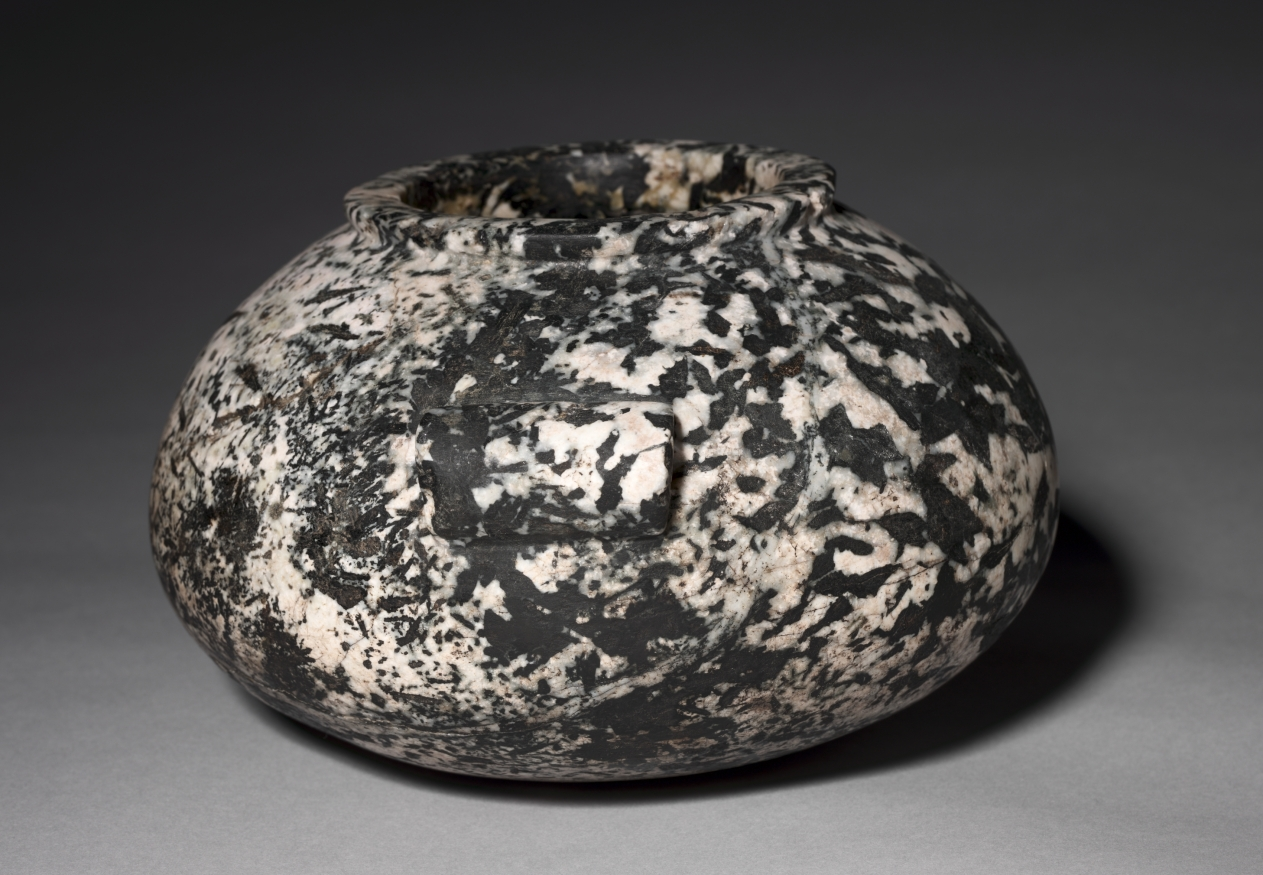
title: Squat Jar with Lug Handles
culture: Egypt, Early Dynastic (2950–2647 BCE), Dynasties 1–3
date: 2950–2573 BCE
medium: pegmatitic hornblende diorite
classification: Vessels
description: A single tomb might contain hundreds of stone vessels replicating the shapes of pottery vessels used in everyday life. The most popular material for stone vessels was white or banded travertine (Egyptian alabaster), found close to the Nile, but prospectors and quarrymen often traveled far in search of the desired materials. The hard stone hornblende diorite, notable for its mottled texture, was quarried in the desert along the route to the Red Sea.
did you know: The stone used for this vessel, a pegmatitic hornblende diorite whose white crystals contain a faint tint of pink, indicates it must have been considered a luxury item.